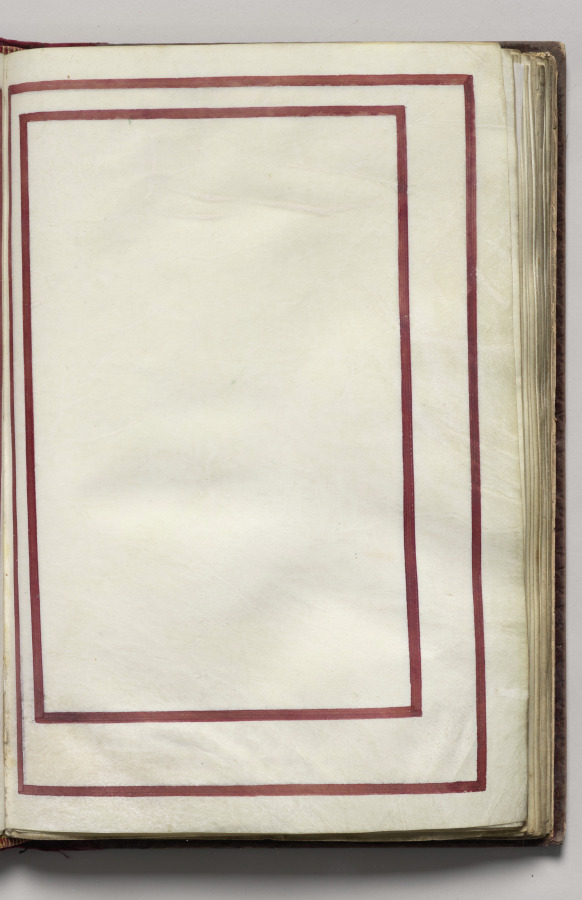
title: Border, folio 11 (recto), from Florilegium (A Book of Flower Studies)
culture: France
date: 1608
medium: watercolor, ink, silver and gold over occasional traces of pencil, on vellum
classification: Bound Volume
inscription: Dated: Poitiers 1608 (on frontispiece) Signed: On frontispiece in black ink, lower right: Van Kuyk Notation on drawing: Frontispiece: in pencil, lower margin: * élève de Van Kessel, peintre flammand (* in pencil also appears in front of Van Kuyk's name).